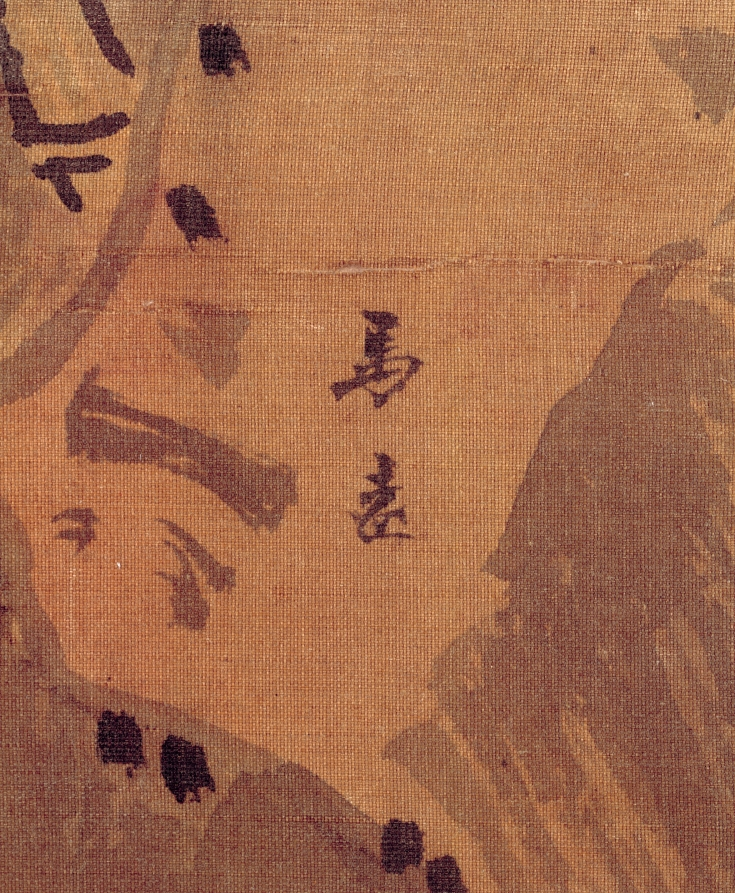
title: Bamboo and Ducks by a Rushing Stream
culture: China, Southern Song dynasty (1127–1279)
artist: Ma Yuan (Chinese, c. 1150–after 1255)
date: 1127–1279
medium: hanging scroll; ink and light color on silk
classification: Painting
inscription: 馬遠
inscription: 12 additional seals: 1 of An Kuo (1481–1534); 7 of Hsiang Yüan-pien (1525–1590); 2 of Liang Ch'ing-piao (1620–1691); 2 unidentified. (WKH)